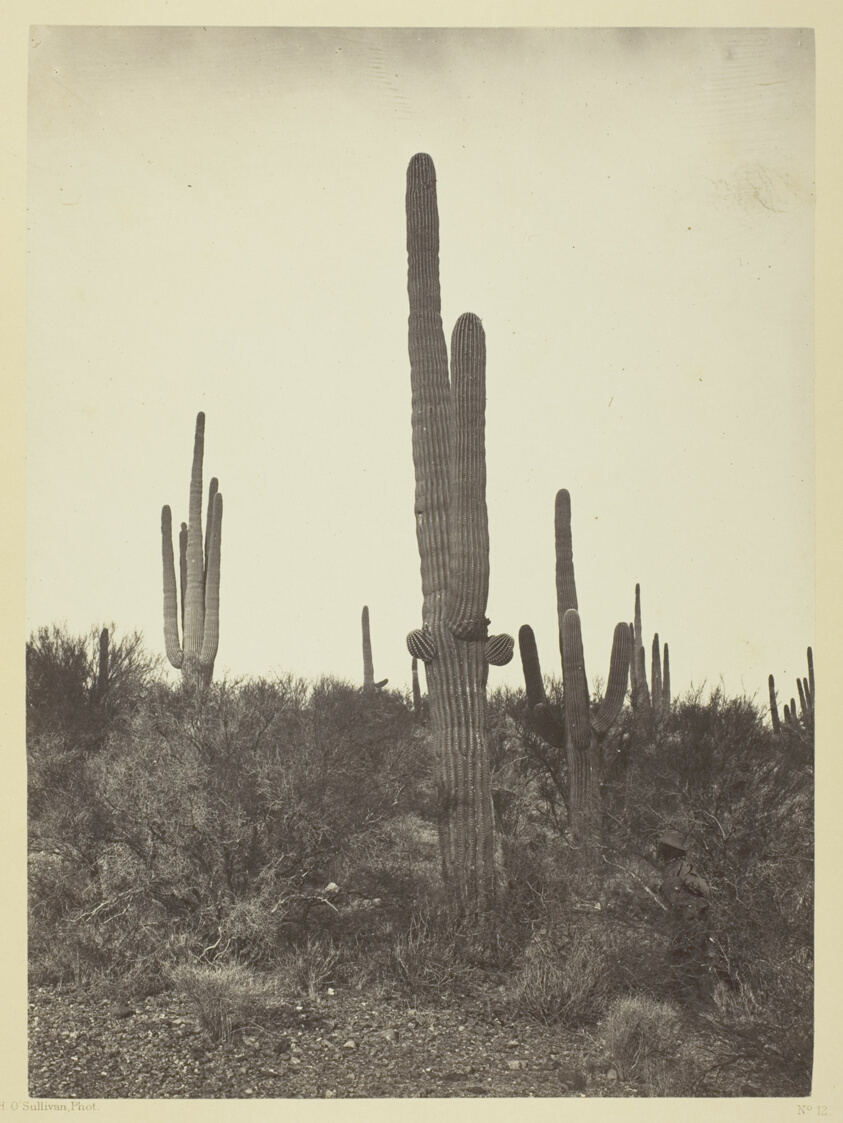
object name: Photograph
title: Cereus Giganteus, Arizona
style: 19th century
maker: Timothy O'Sullivan (American, born Ireland, 1840–1882)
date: 1871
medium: Albumen print, from the album "Geographical & Geological Explorations & Surveys West of the 100th Meridian," vol. 2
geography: United States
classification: albumen print from collodion negative; photograph; photography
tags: Collected by Hugh Edwards